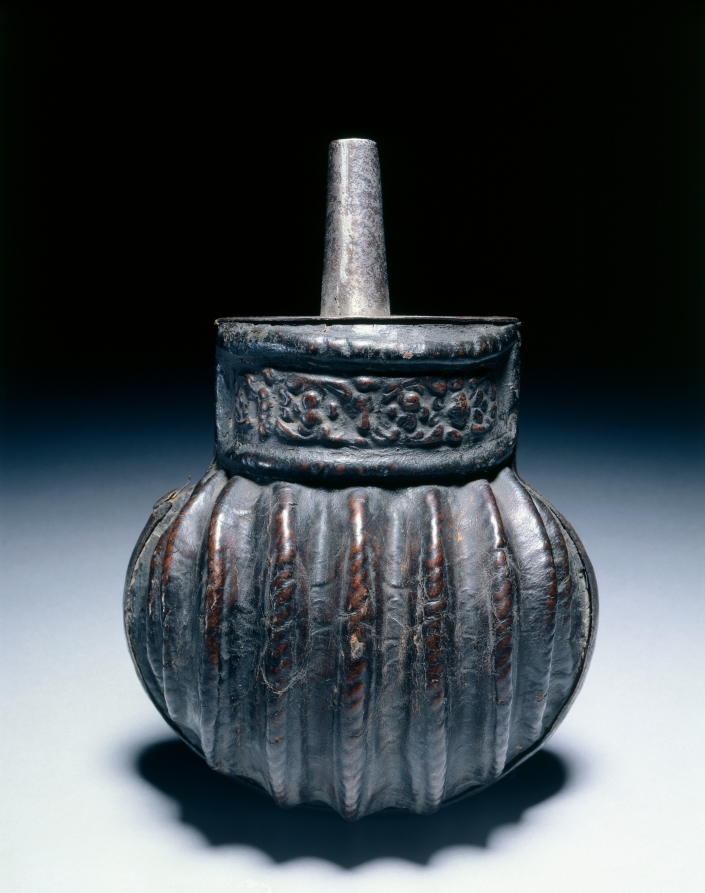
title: Powder Flask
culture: Italy, late 16th century (?) questionable authenticity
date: 1500s(?)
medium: leather (cuir bouilli); modern steel mounts and fitting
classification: Arms and Armor